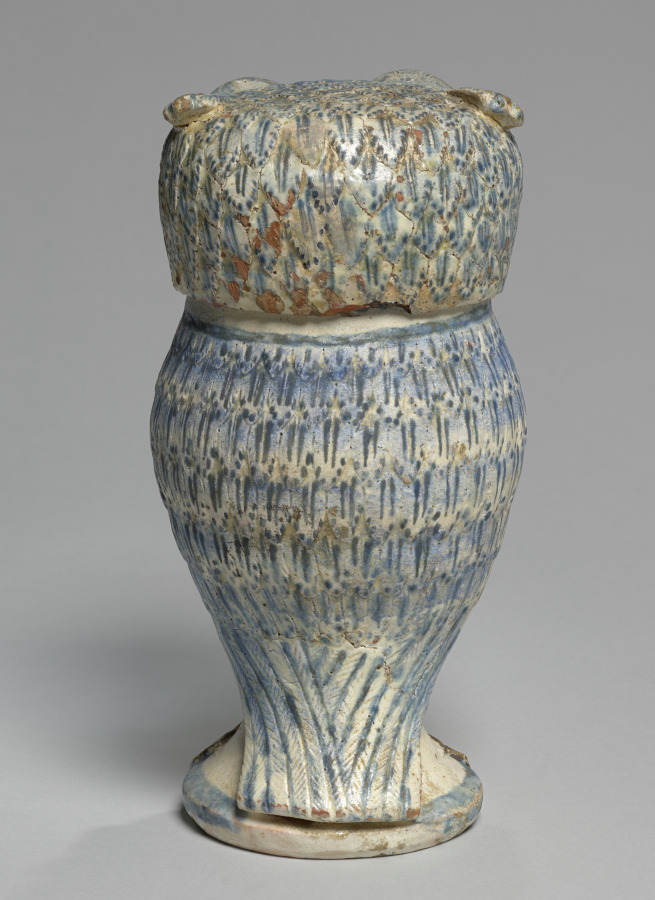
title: Owl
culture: Southern Germany, 16th century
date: 1540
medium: faience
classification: Ceramic